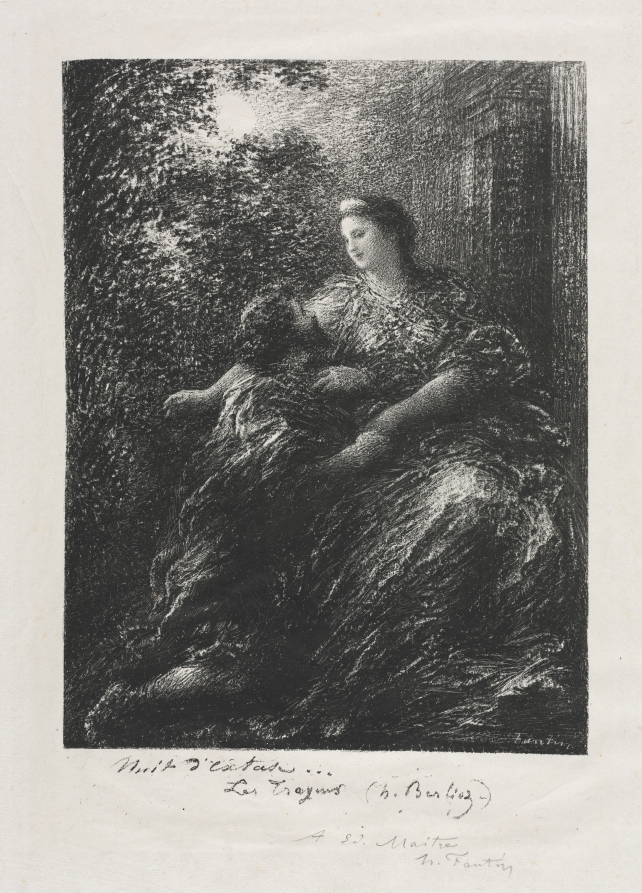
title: Duet of the Trojans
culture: France, 19th century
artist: Henri Fantin-Latour (French, 1836–1904)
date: 1894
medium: lithograph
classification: Print